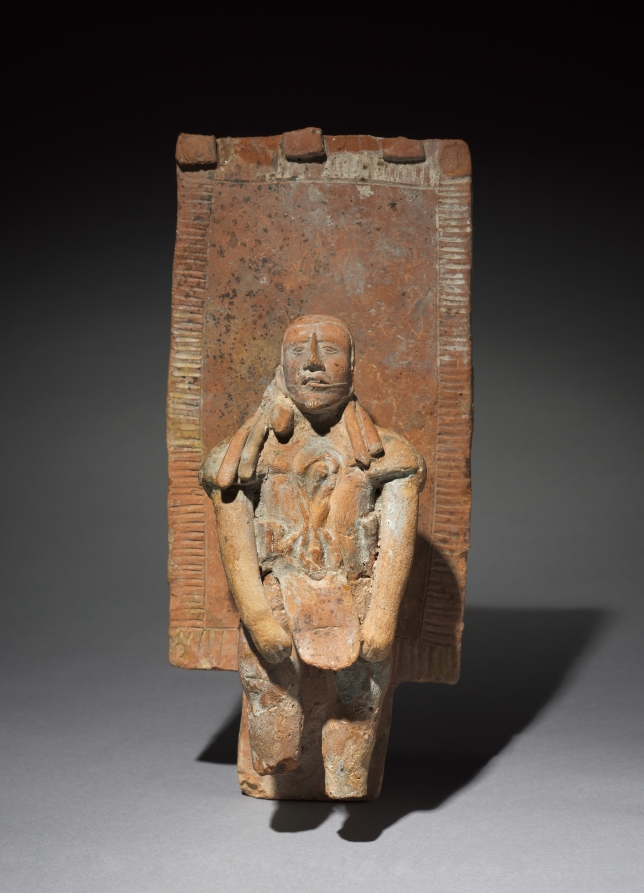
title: Figurine with Back Rack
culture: Mexico, Maya, Jaina style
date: 300–900 CE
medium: molded and modeled pottery with traces of pigment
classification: Sculpture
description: Maya figurines—made by hand, with molds, or sometimes a combination of the two techniques—represent a wide range of human, animals, and supernatural beings. This example is a male with an enormous backrack, an article of ceremonial attire worn by dancers and other courtly personnel. Figurines have been found in tombs and offerings but also in household contexts.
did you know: Figurines from Jaina, an elite Maya burial ground, served as companions for the dead.